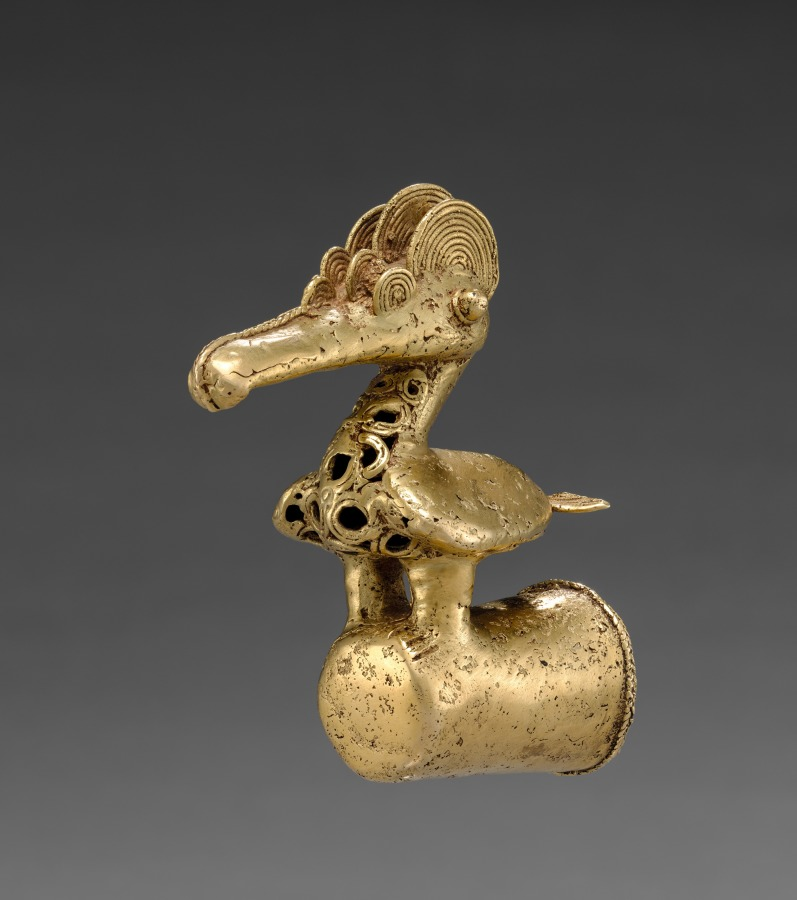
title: Finial with Long-Beaked Bird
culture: Isthmian Region (Colombia), Sinú (Zenú), 5th century-11th century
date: 400–1000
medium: gold, cast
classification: Metalwork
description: Unique to Colombia's Sinú region are gold finials with sculptural images at right angles to thimble-like caps; the caps fit over the end of a staff, an emblem of rank that may have been held horizontally. This impressive finial features a dignified, long-beaked bird whose body contains a pellet that rattles when the finial moves. Sinú animal imagery is understudied but may relate to beliefs about the cosmos. For instance, contemporary natives attribute importance to birds because they have the capacity to move among different environments (air, land, water); they may have been regarded as mediators among levels of the cosmos.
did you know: Birds, particularly water birds, may have been thought to travel between the different layers of the universe.